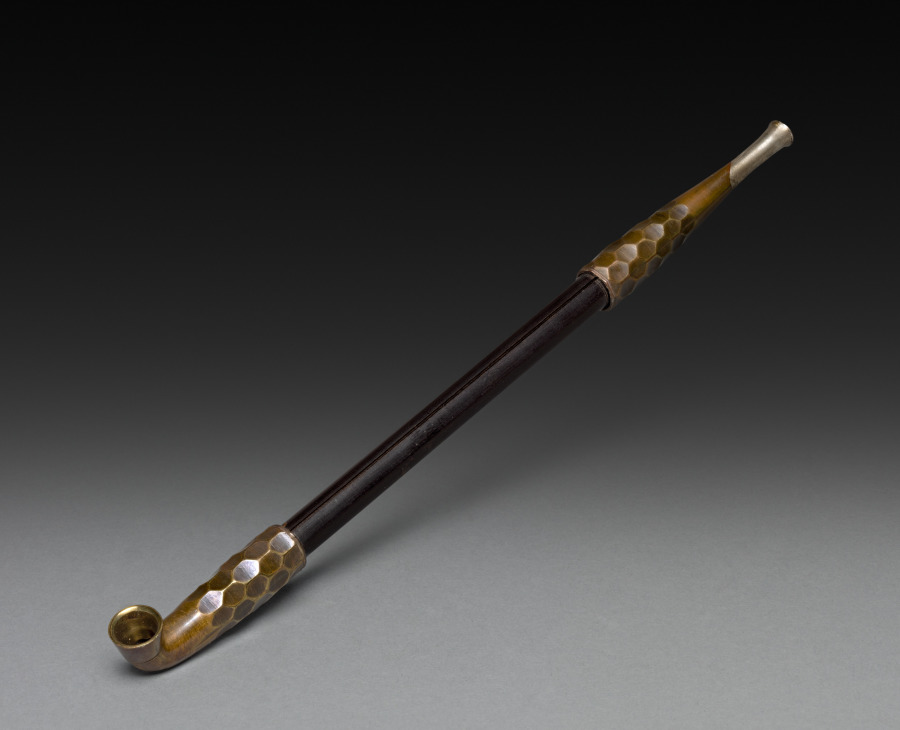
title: Tobacco Pipe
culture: Japan, Edo period (1615–1868)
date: early to mid-1800s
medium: wood and brass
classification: Miscellaneous